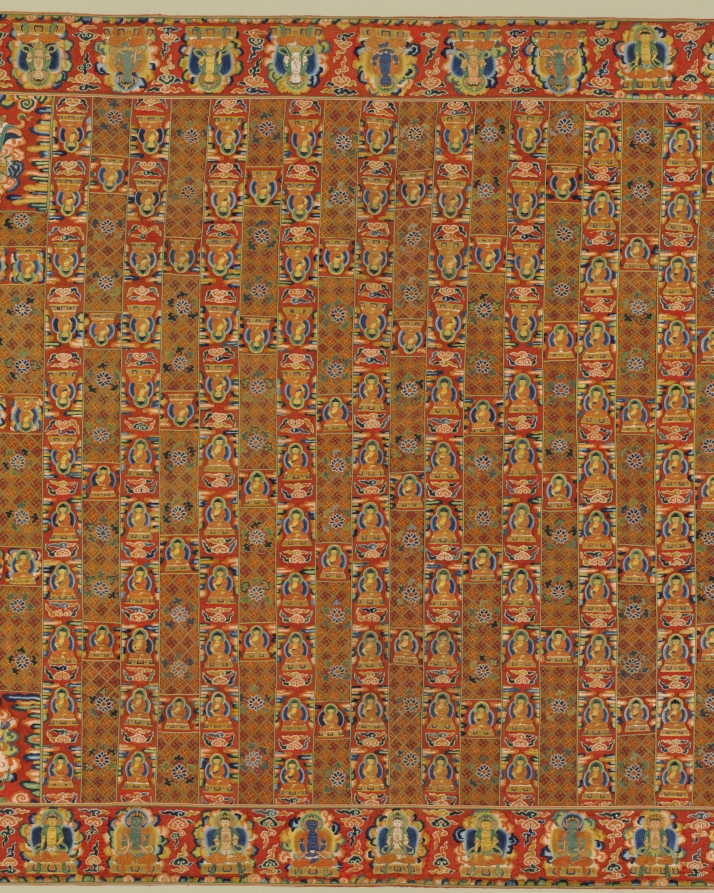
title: Buddhist Priest's Ceremonial Robe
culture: China, Ming dynasty (1368–1644)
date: 1400s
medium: silk and gold thread; embroidery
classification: Garment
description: This example of imperial embroidery is one of the earliest surviving Chinese Buddhist robes (kasaya) in the West. Depicting 991 Buddhas, each slightly different, it is constructed out of patches in reference to the legend in which the Buddha's favorite disciple divided a robe he was given into 30 pieces. Patchwork is also a sign of humility. Multiple Buddha images known as “thousand Buddha” designs are seen painted and sculpted on the walls of cave temples in India, Afghanistan, Central Asia, and China, but are rare on garments. The Four Heavenly Kings, guardians of the four directions, occupy the textile’s corners. When draped around the body, the inverted figures in the upper left corner appear right side up. Robes with 25 columns were worn by the highest-ranking clergy on ceremonial occasions.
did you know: The Five Transcendent Buddhas, who symbolize the purity of the five elements, are repeated around the edges.